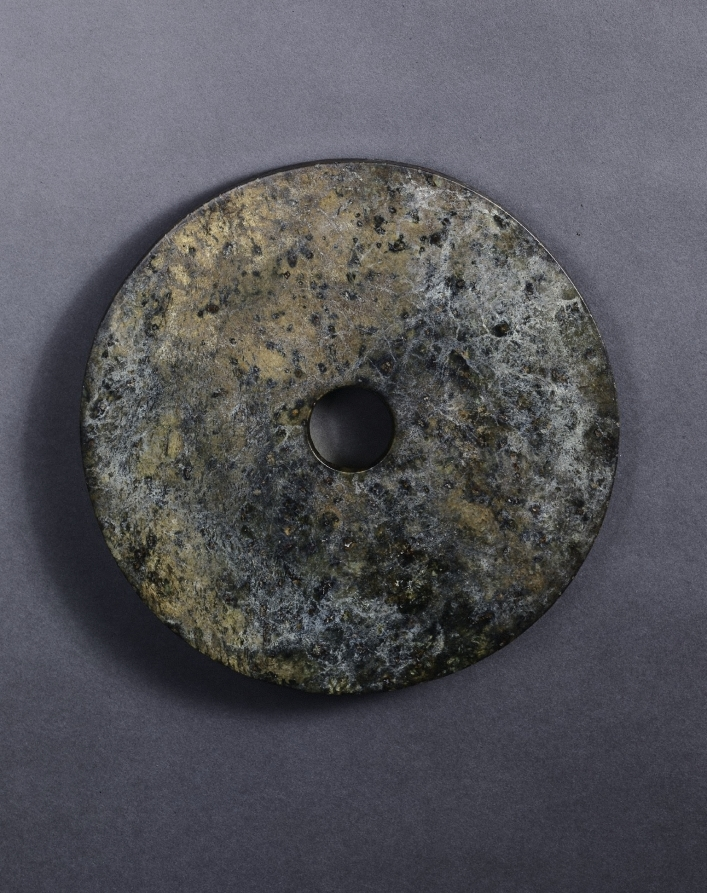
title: Ceremonial Disc (Bi)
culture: East China, Neolithic period, Liangzhu culture (3300–2200 BCE)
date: 3300–2200 BCE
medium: jade (nephrite)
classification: Jade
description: The Liangzhu culture, one of the later Neolithic cultures of East China, excelled in jade working. Exceptionally large versions like this disc are rare and usually occupied pride of place on the chest of the buried. Traditionally called bi, these plain discs, together with cong, squared cylinders, form an essential ritual pair in Liangzhu burials of high-status individuals.